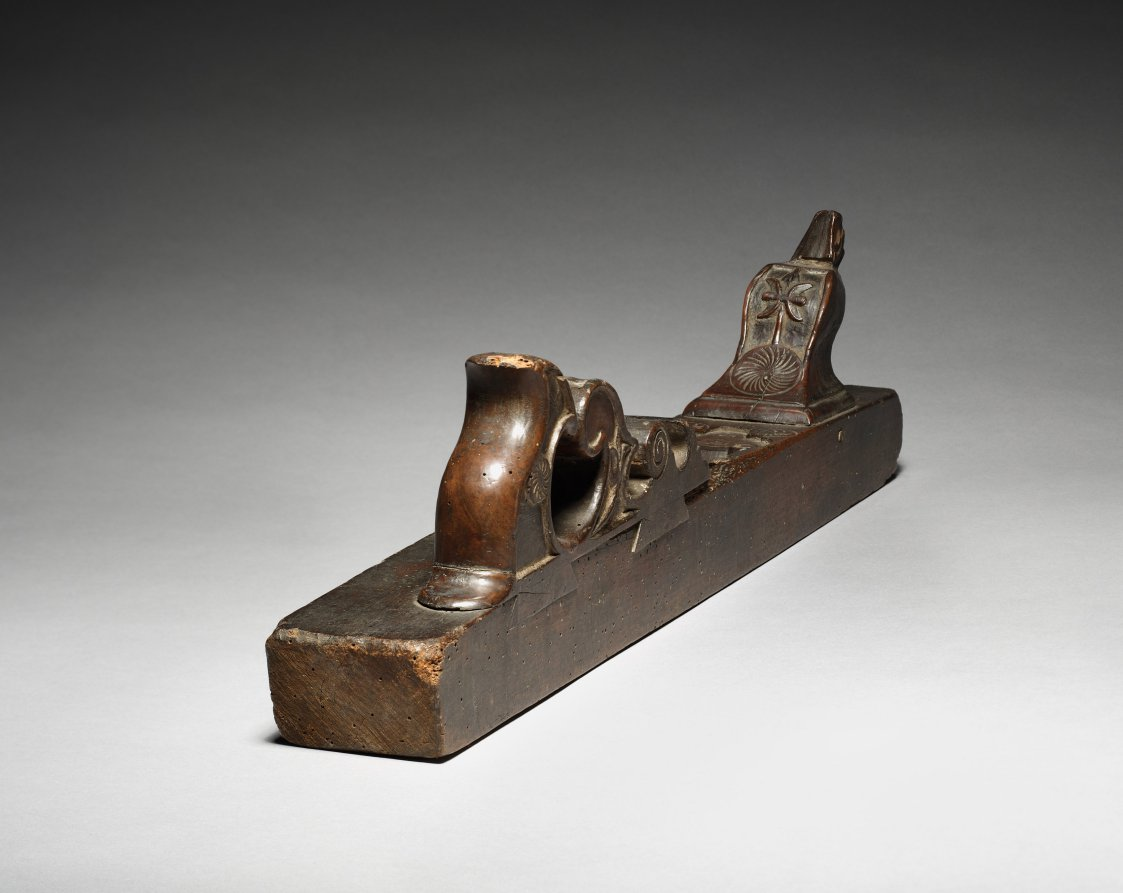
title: Carpenter's Plane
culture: Italy, early 17th century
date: early 1600s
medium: wood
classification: Tool